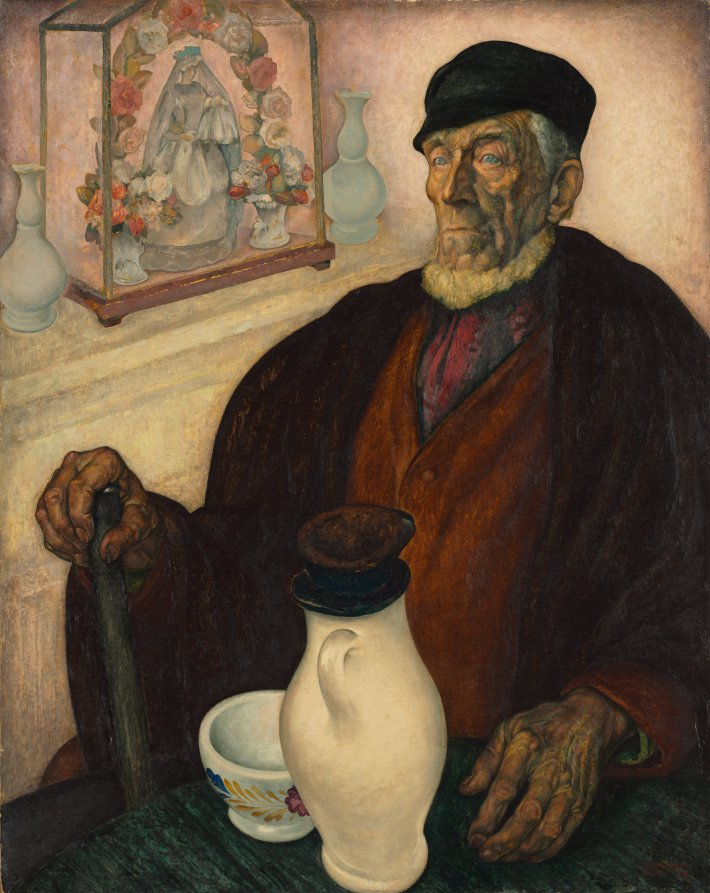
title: The Burgomaster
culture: Belgium, 19th century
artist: Anto Carte (Belgian, 1886–1954)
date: 1924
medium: oil on canvas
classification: Painting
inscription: signed lower right: ANTO-CARTE / BRVX. 24 [inscribed on back: Le Bourgmestre]